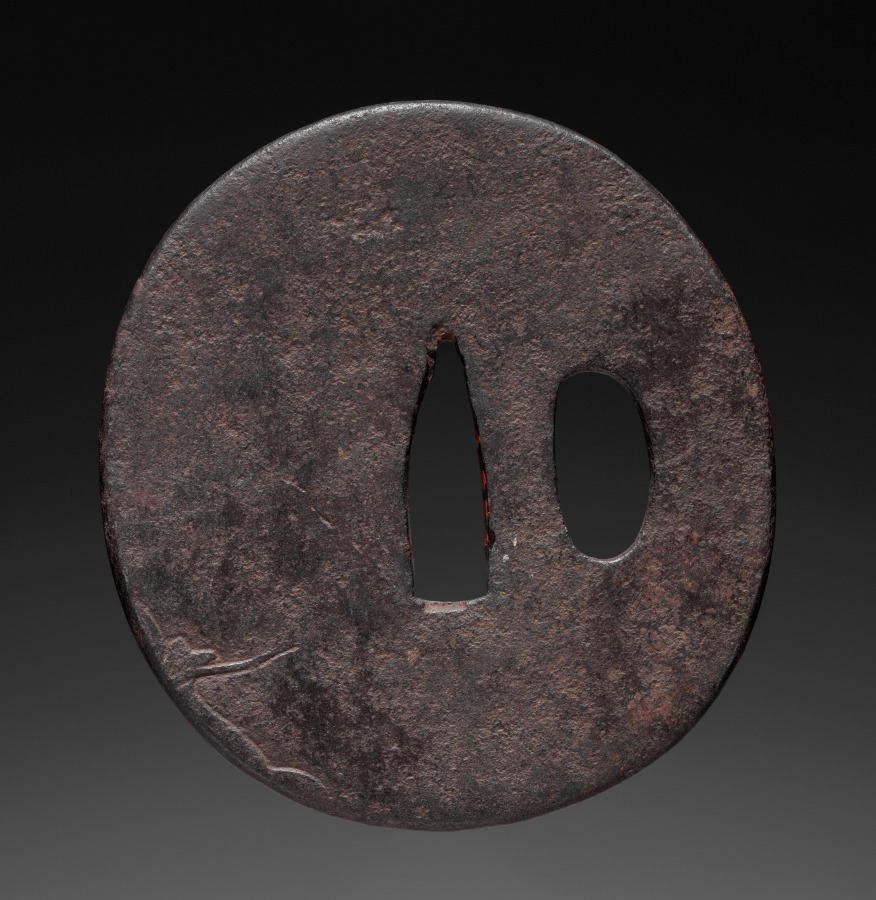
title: Sword Guard (Tsuba) with Hermit Crab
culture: Japan, possibly Edo period (1615-1868)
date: c. 1615–1868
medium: iron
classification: Arms and Armor